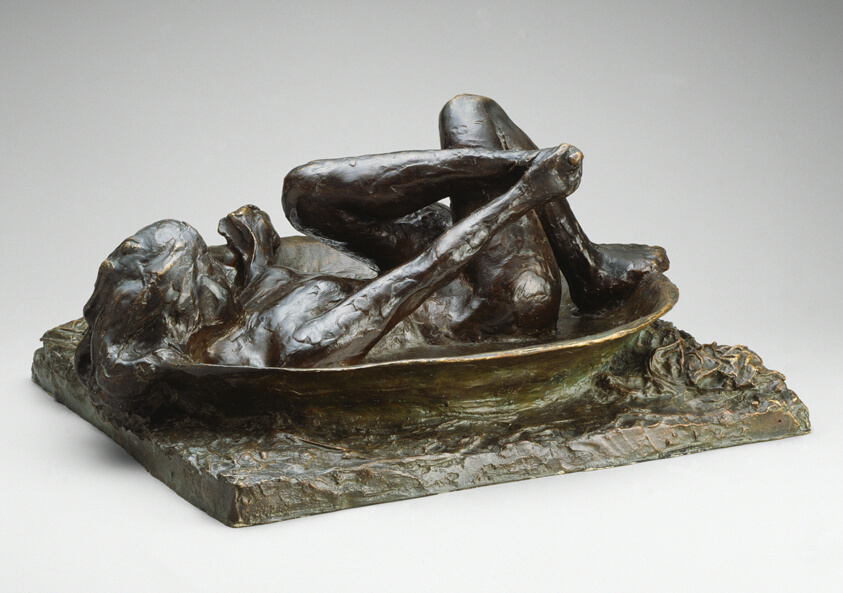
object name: Sculpture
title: The Tub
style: Impressionism, nineteenth century, 20th Century, 19th century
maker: Edgar Degas (French, 1834–1917)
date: Modeled 1889, cast 1919/21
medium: Bronze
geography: France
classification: statuette; french; sculpture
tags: women, nudes, domestic scenes, domestic, bathers, everyday life (genre), water